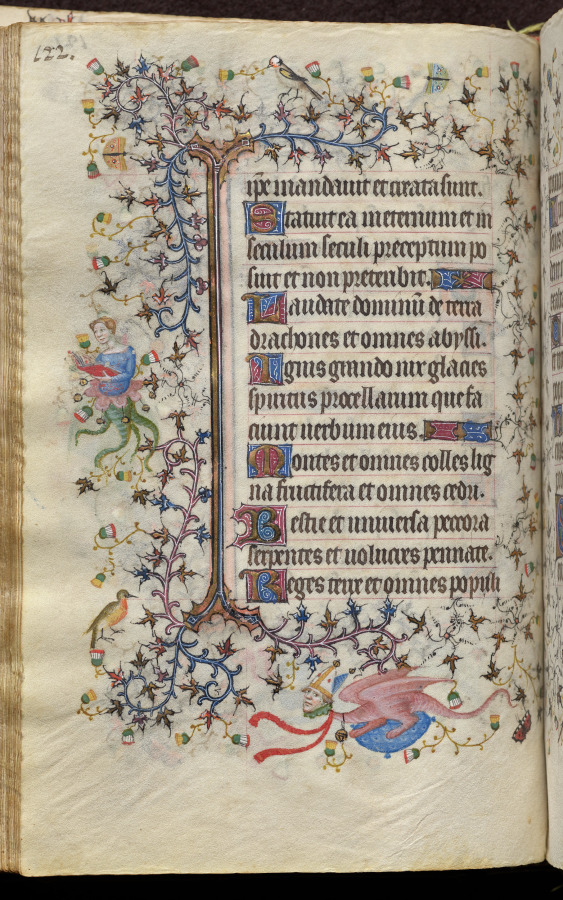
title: Hours of Charles the Noble, King of Navarre (1361-1425): fol. 61v, Text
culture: France, Paris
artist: Master of the Brussels Initials and Associates (French)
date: c. 1405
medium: ink, tempera, and gold on vellum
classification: Bound Volume